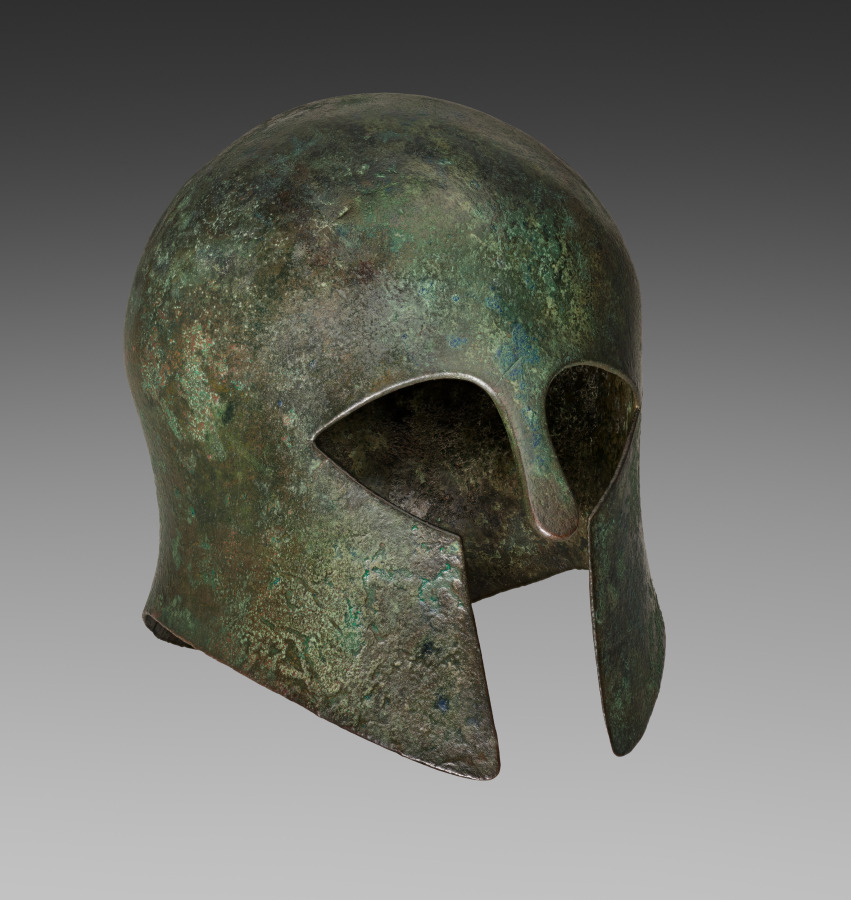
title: Corinthian Helmet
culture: Greek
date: c. 625–550 BCE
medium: Bronze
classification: Arms and Armor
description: This remarkably well-preserved bronze helmet belongs to an iconic type known as Corinthian yet produced far beyond the city of Corinth. Designed for use by hoplite warriors, who fought with spears and shields in shoulder-to-shoulder (phalanx) formation, such helmets provide maximum protection but limited vision, hearing, and movement. Probably first cast and then hammered into its final shape, the helmet features both gentle curves and sharp angles, evoking the head and face that it protected. Similar helmets appear frequently on warriors shown in ancient art, though often with crests of horsehair or other organic materials that no longer survive.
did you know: A small hole above the rear neckline, now repaired, may reflect a fatal blow.